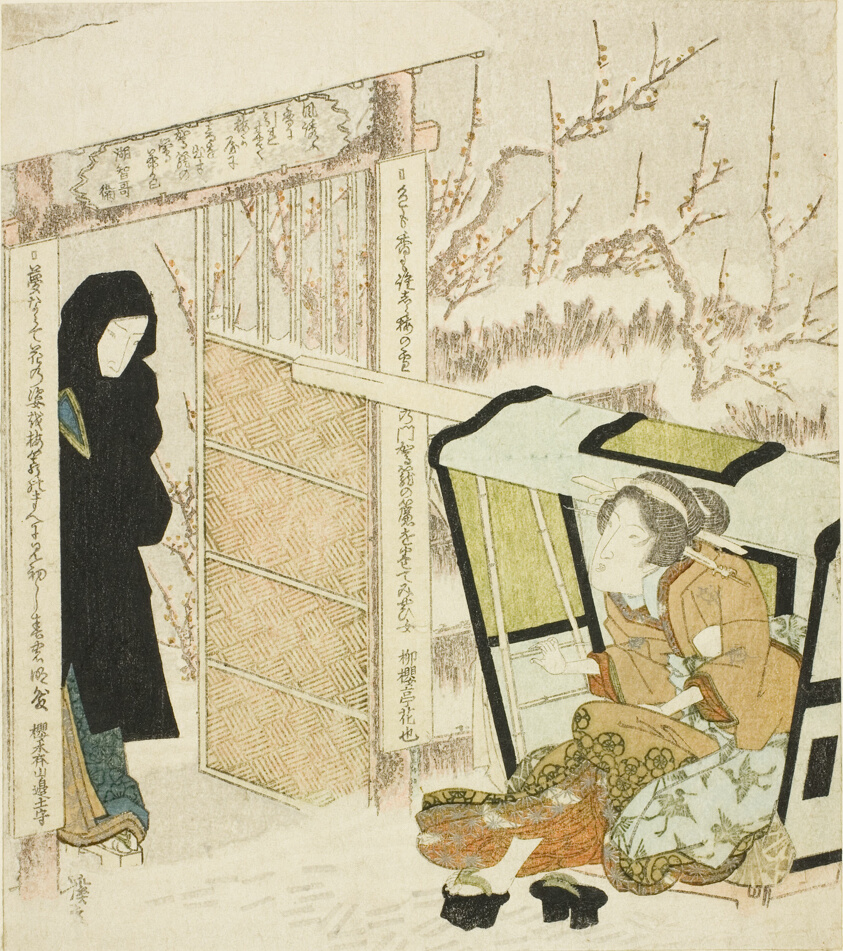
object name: Print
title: Courtesan Stepping out of a Palanquin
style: Japanese (culture or style)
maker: Keisai Eisen (Japanese, 1790-1848)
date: c. early 1820s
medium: Color woodblock print with metallic pigments; shikishiban, surimono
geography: Japan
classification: woodblock print; print; asian art